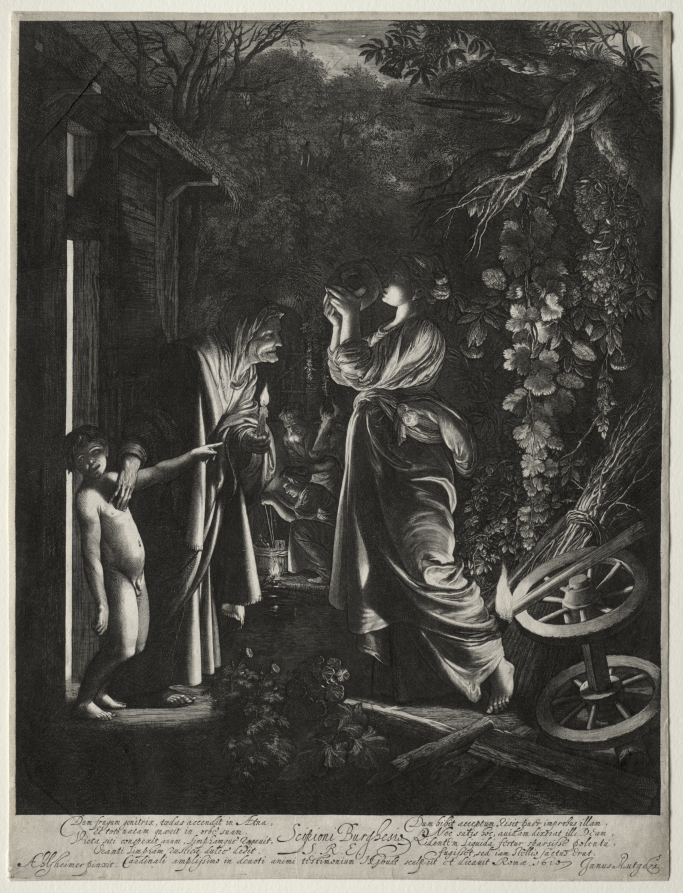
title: The Mocking of Ceres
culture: Netherlands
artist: Hendrik Goudt (Dutch, 1583–1648)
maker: after Adam Elsheimer (German, 1578-1610)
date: 1610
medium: engraving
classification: Print